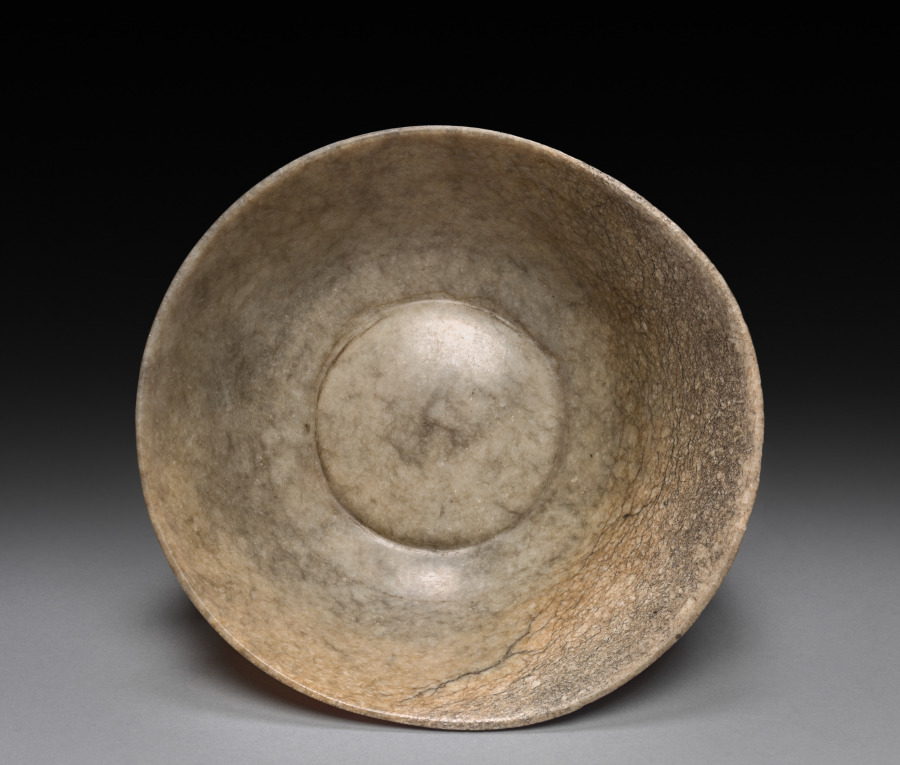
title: Libation Cup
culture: China, Song dynasty (960-1279) or later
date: 960–1279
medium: jade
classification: Jade